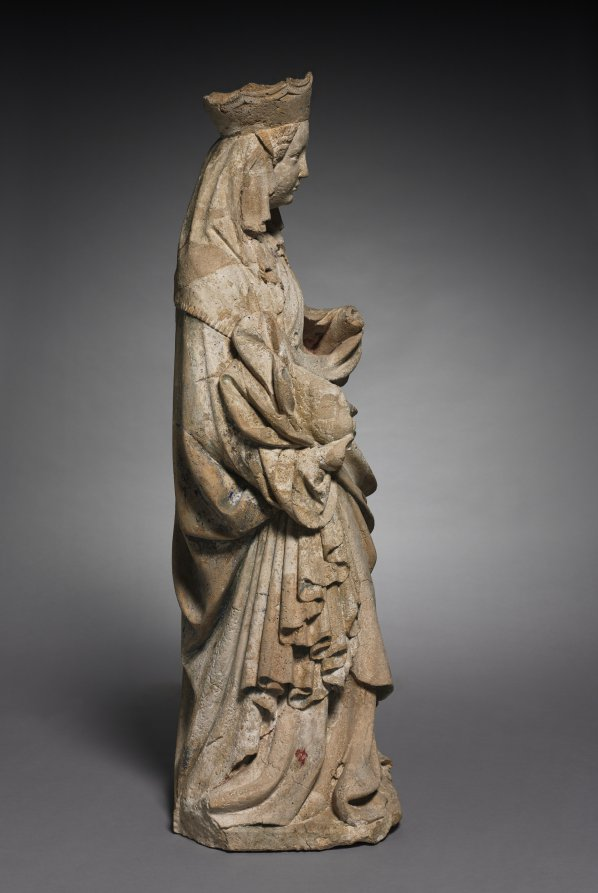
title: Virgin and Child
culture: Austria, Lungau, Church of Mariapfarr, late 14th century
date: c. 1395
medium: cast stone with traces of original paint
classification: Sculpture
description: This sculpture—damaged during the 1800s and now missing the figure of the Christ child—is a fine early example of the type known as the Schöne Madonna or "Beautiful Virgin." This type became popular around 1400 and emphasized the graceful curve of the Virgin’s posture combined with deep, slightly exaggerated drapery folds. This sculpture is known to have come from the Church of Mariapfarr in the Diocese of Salzburg. It was made using a casting technique known as "lost shape." The casting consisted of pulverized limestone combined with quicklime and milk curd poured into a mold. After the cementlike mixture set for several weeks, the mold was destroyed to remove the sculpture, which could then be filed, polished, and painted.